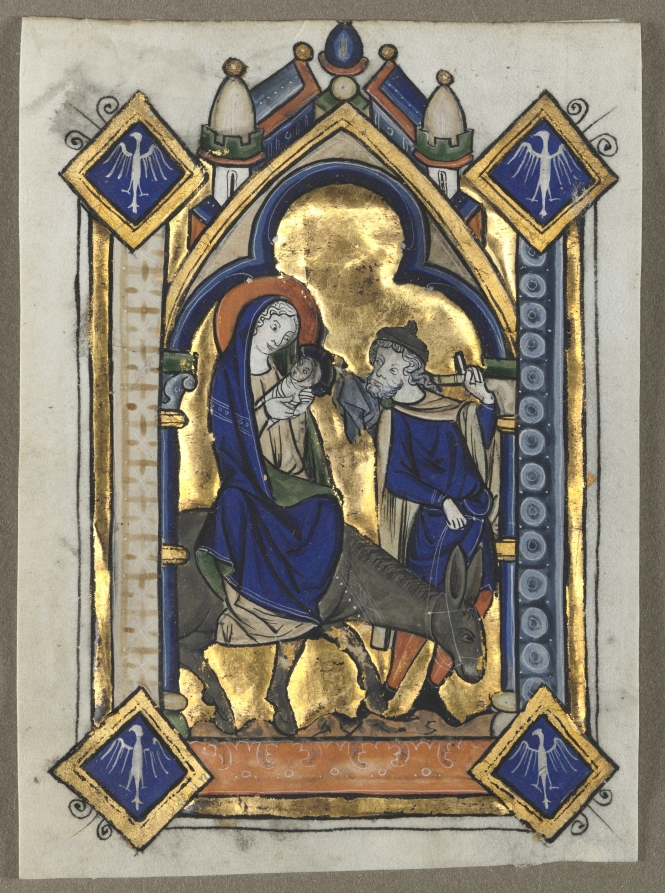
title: Leaf Excised from a Psalter: Flight Into Egypt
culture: Flanders, Liège(?), 13th century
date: c. 1260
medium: tempera and burnished gold on vellum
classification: Manuscript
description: Traditional locations within manuscript psalters were designated by decorated initials or, as is the case here, full-page miniatures. These locations marked the major divisions of the psalms as used in the daily office. The extraordinary quality of these miniatures suggests they once decorated a deluxe psalter made for a wealthy or aristocratic patron, possibly a cleric.